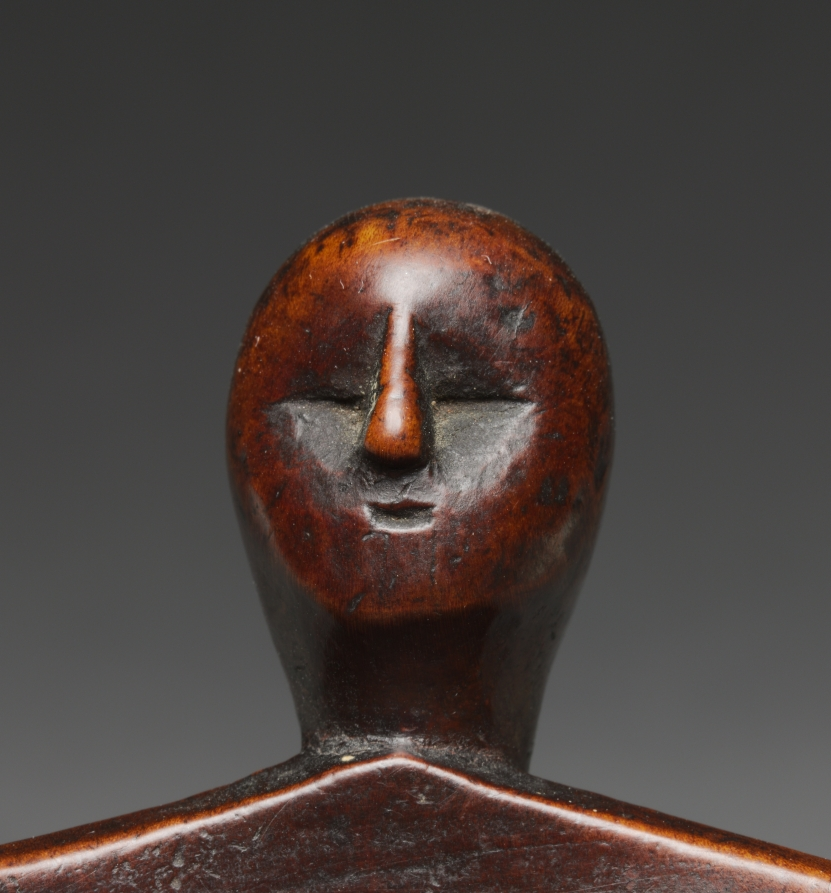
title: Bowl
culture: Native North America, Northeastern Woodlands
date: early 1800s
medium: wood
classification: Wood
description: Fine wooden bowls were often used during feasts in the Northeastern Woodlands. The heads on the rims may represent spirit beings, perhaps the owner’s guardian spirits, acquired through dreams or visions—thought to be the ultimate sources of truth. The medium may also be profoundly meaningful. A Great Lakes (Meskwaki) Native said in 1911, “The murmur of the trees when the wind passes through is but the voices of our grandparents. Often a whole forest hums with talk . . . we often hear the sound of their laughter and the sound of their lamentations.”